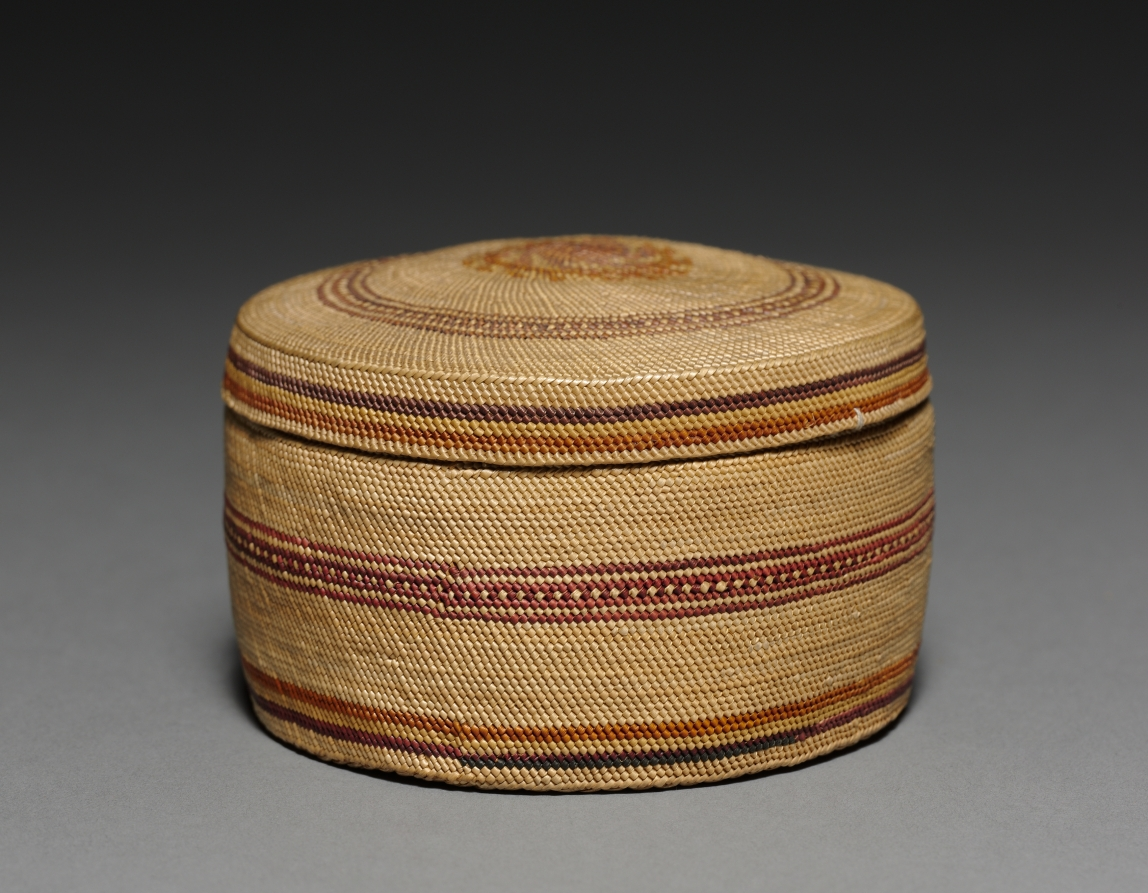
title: Lidded Bowl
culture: Northwest Coast, Makah, late 19th century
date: c 1900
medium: Cedar bark, deer grass; wrapped twining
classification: Basketry